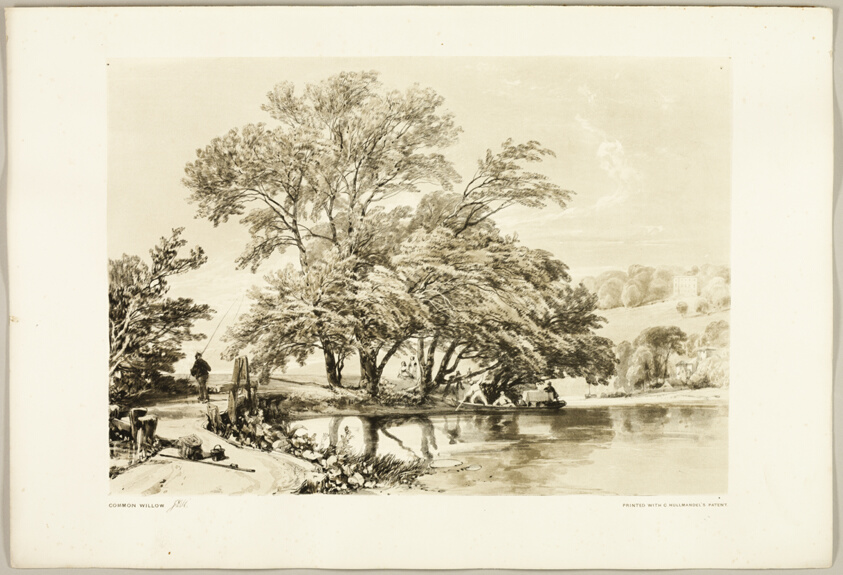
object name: Print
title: Common Willow, from The Park and the Forest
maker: James Duffield Harding (English, 1798-1863); printed by Charles Joseph Hullmandel (English, 1789–1850); published by Thomas McLean (English, 1788–1875)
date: 1841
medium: Lithograph in black, with brown tint from a second plate, on ivory wove paper, laid down on ivory wove paper (chine collé)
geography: England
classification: lithograph; print; prints and drawing